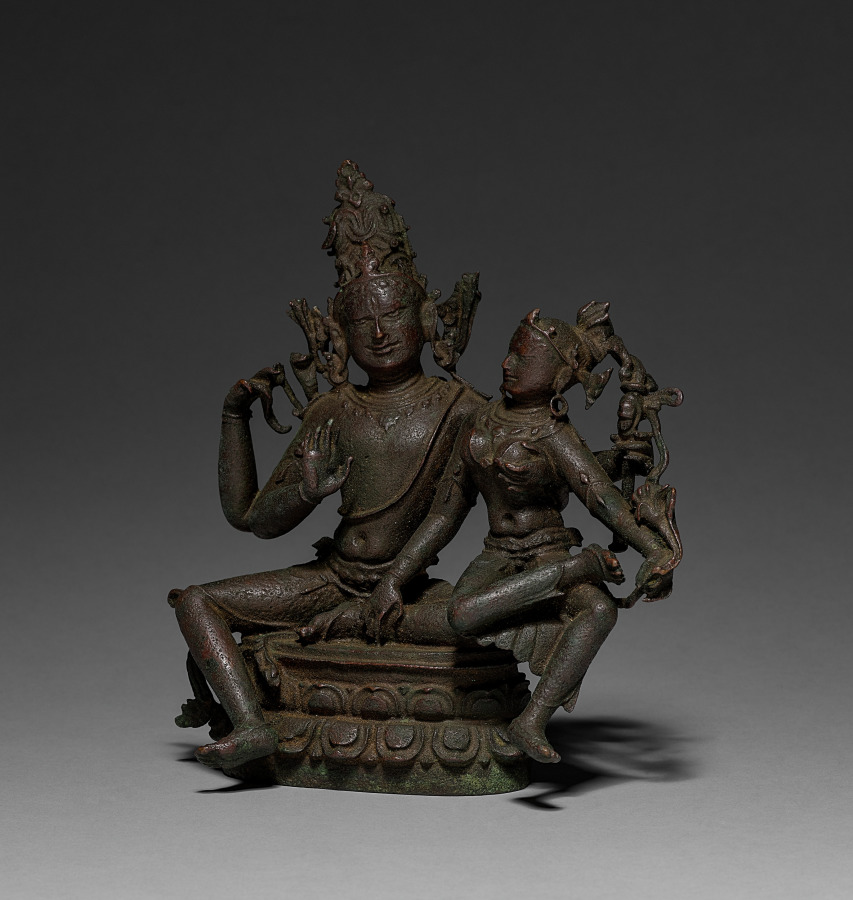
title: Shiva and Parvati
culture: East India, Bengal, Pala period, 9th Century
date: 800s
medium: bronze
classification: Sculpture